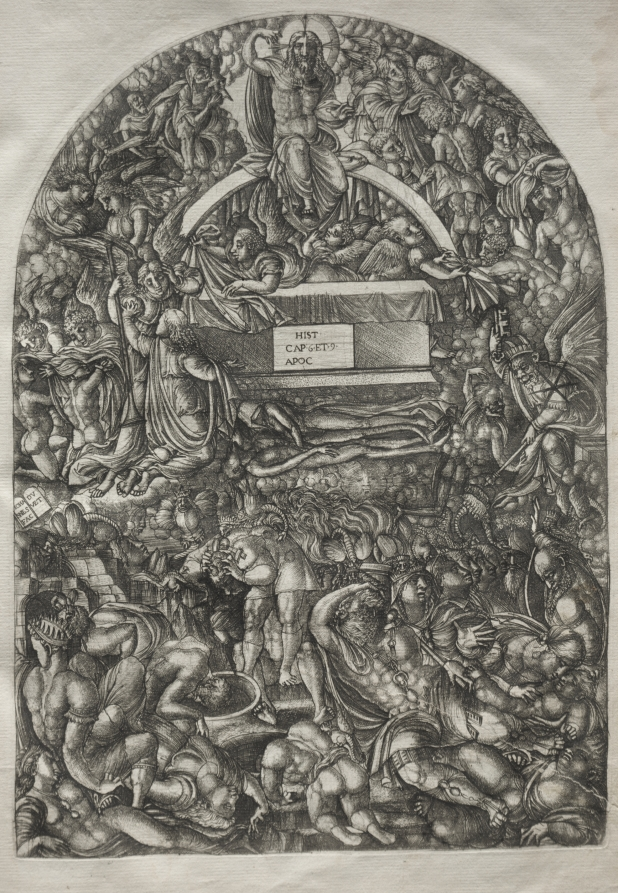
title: The Apocalypse: A Star Falls and Makes Hell to Open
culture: France, 16th century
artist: Jean Duvet (French, 1485–1561)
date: 1546–1556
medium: engraving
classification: Print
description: This print is part of a bound volume of works illustrating the a narrative of the Apocalypse, taken from the Revelation of Saint John in the Bible. The 23 engravings in the series occupied the artist for a number of years and represent his greatest artistic achievement. The museum's volume is one of only seven known complete sets. Jean Duvet was one of the first major printmakers in France and one of the most original artists of the 1500s. Although he worked mostly in the provincial city of Langres, he became aware of Italian art through the circulation of prints—notably those of Marcantonio Raimondi. His solidly modeled human figures reflect the influence of the Italian High Renaissance. Duvet, however, developed an idiosyncratic, highly artificial style with crowded compositions that ignore rational space in favor of ornamental surface patterns.